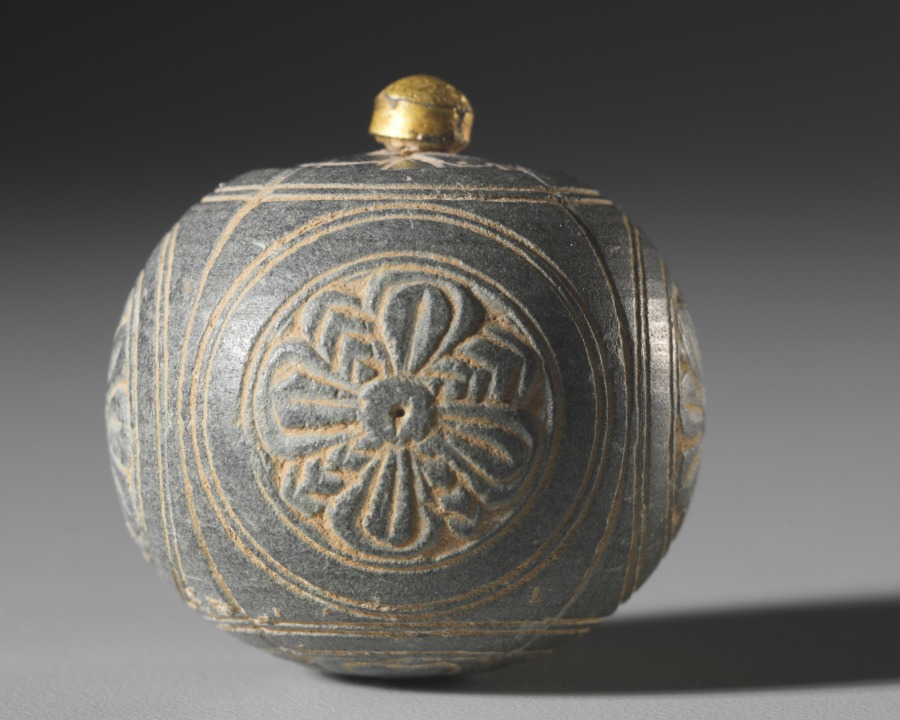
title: Miniature Stone Reliquary or Toilette Casket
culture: Pakistan, Gandhara, probably Sirkap, early Kushan period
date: 1–100 CE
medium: gray schist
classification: Sculpture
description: Tiny reliquaries holding the cremated remains of the Buddha or a high-ranking holy person empowered monuments and made them sacred. A Buddhist monument, such as the solid hemispherical mounds called stupas, would not be worshipped until it was consecrated with the relic secreted inside. Bits of ash were combined with tiny gems inside a crystal or glass reliquary, which was then placed inside a stone or metal container, like the lidded versions seen here. These containers look like cosmetic vessels for aromatic pastes used for perfume in ancient India. Buddhist texts state that the enlightened Buddha emitted a fragrance like sandalwood paste; the form of the reliquary as a perfume bottle indicates the presence of the Buddha by the visual reference to his pleasant scent. Once enclosed in the stupa the reliquaries would not be seen, but monks were tasked with applying sandalwood paste to the exterior of stupas as part of their regular maintenance to convey to visitors the ongoing presence of the Buddha radiating from the relic in the center.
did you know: The knob of the lid is gilded, as is the interior of the casket.